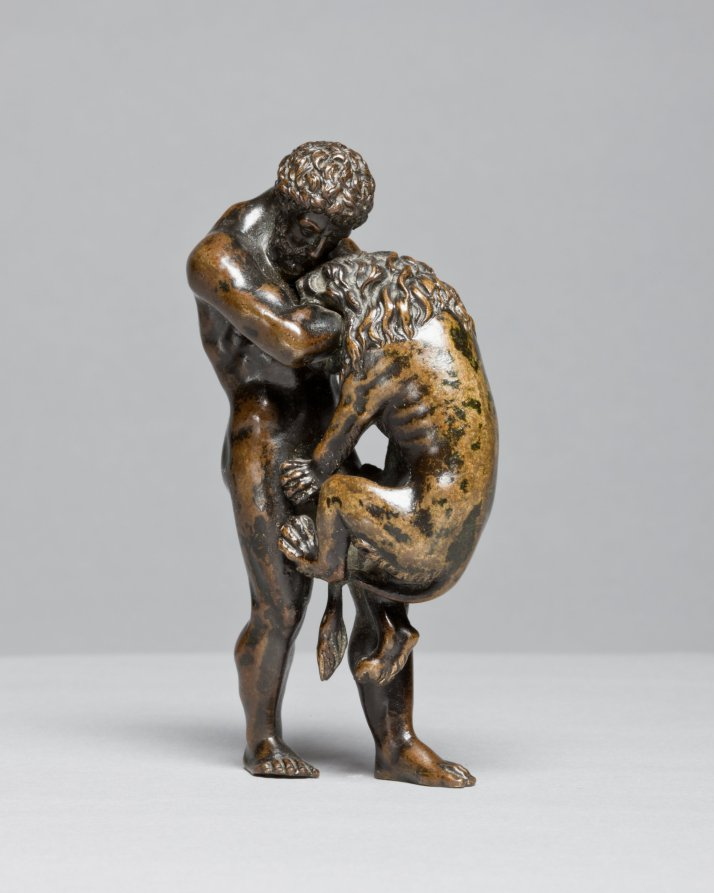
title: Hercules and the Nemean Lion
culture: Italy or France, 16th century or later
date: 1500s or later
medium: bronze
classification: Sculpture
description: The original owner of this work would have understood that this scene referred to the entire story of Hercules, the demi-god who had to accomplish twelve labors. The lion is named after the city of Nemea, near Corinth, a monstrous beast sent by the goddess Hera to wreak havoc on the area. After killing the lion, Hercules wore his pelt, commonly seen in other representations of the hero.